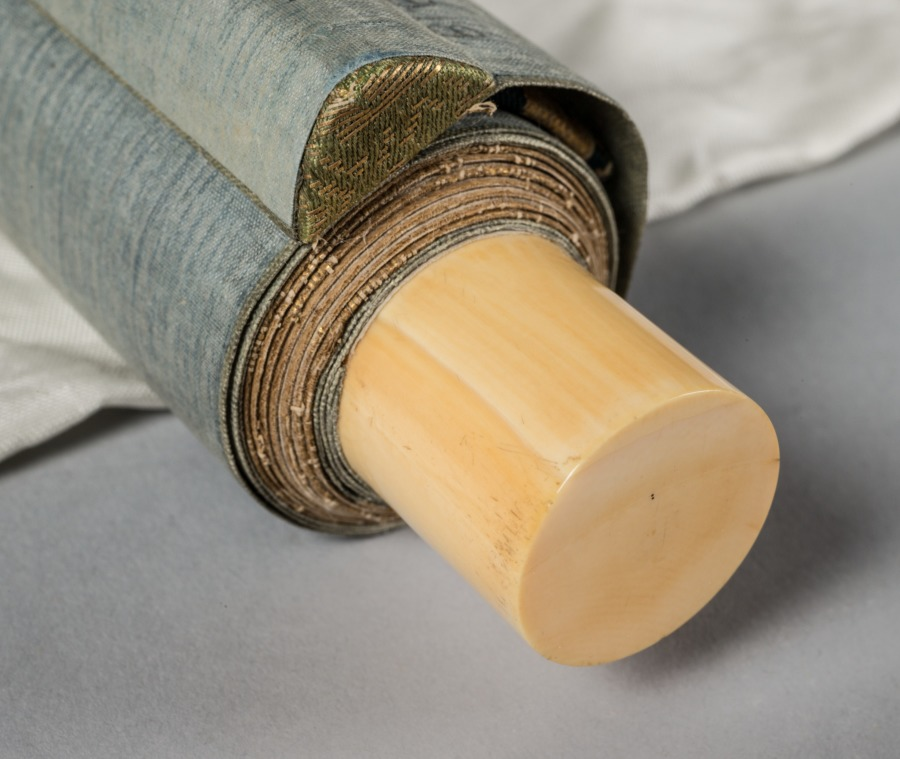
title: Female Daoist Figure in Landscape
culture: Japan, Muromachi period (1392–1573)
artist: Kōboku (Japanese)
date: early 1500s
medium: hanging scroll; ink on paper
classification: Painting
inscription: 「興牧」（朱文方印）